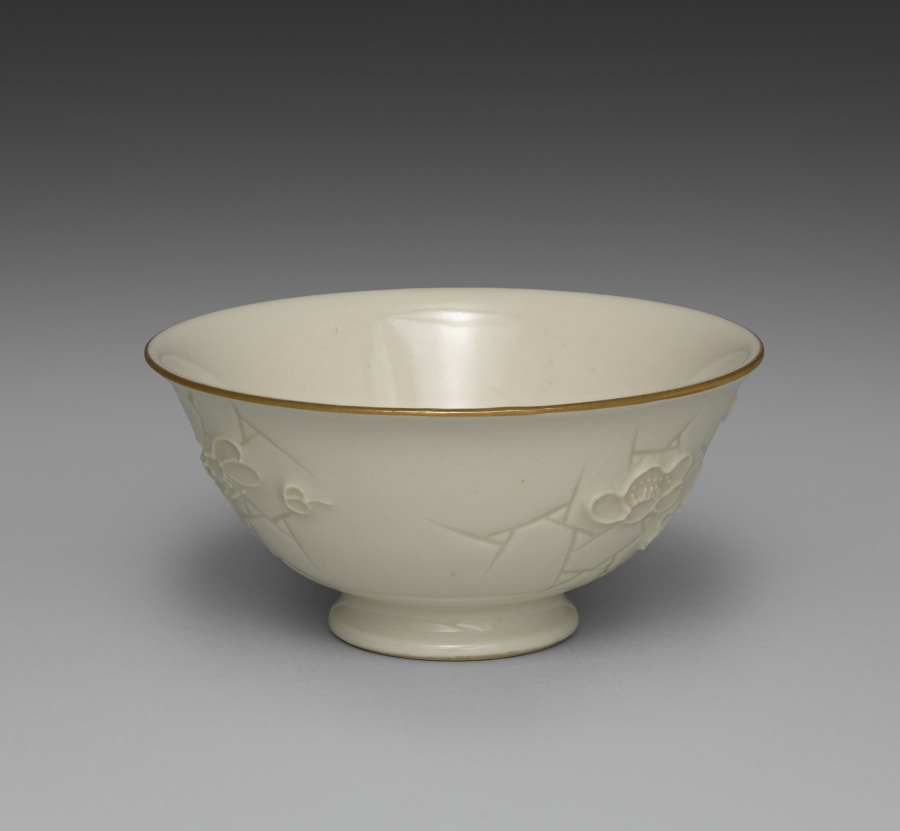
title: Bowl from Dining Set with Plum Blossoms and Cracked-Ice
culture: Japan, Meiji period (1868–1912)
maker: Seifū Yohei II (Japanese, 1844–1878)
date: c. 1875–78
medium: Porcelain with molded designs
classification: Ceramic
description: Each item in this set has a delicate low-relief design of flowering plum branches over scattered, intersecting lines meant to resemble the cracked-ice surface of a frozen body of water and is signed on the base in gold pigment. While Yohei II produced many fine works in underglaze blue, like those produced by Kiyomizu Shichibei, he also made works in quite different styles later in his career, from the early 1870 s. In 1873, he was appointed purveyor to the Industrial Center of Kyoto Prefecture, a designation associated with Kyoto’s efforts to reach an international market through the port of Kobe; and from 1875 until his death, he was involved in national-level projects to present Japanese ceramics across the world. It was during this period that Yohei III was apprenticed to Yohei II, and it has been suggested that this set may in fact be an early example of Yohei III’s work, which he signed with his teacher’s name. Decorated with flowers resembling Japanese textile motifs, the set calls to mind the design of Yohei II’s pair of vases with plum blossoms in the Victoria and Albert Museum. Here, the elaborate trees created for a formal public exhibition setting have been translated into the approachable blossoms of the genteel domestic environment. While the designs are consistent across the pieces, each raised flower petal and pistil and each incised line in the ice was done by hand, so the cups, bowls, and dishes are similar yet unique. The bottoms of two boxes once identified the set’s owner, but the information has been deliberately obscured with black ink. However, inscriptions still visible appear to indicate two occasions, once at the end of July 1886 , and once again in June 1916 , when parts of the set were requested from Hokura in Niigata Prefecture. The location corresponds to a neighborhood in the present-day city of Jōetsu. The surname Tsuji 辻 also appears on a paper tag affixed to one of the box cloths. Future research may possibly reveal more about their provenance. A vase by Yohei III in a private collection combines the formal grandeur of the Yohei II vases in the Victoria and Albert Museum with the gentler design of this dining set, placing flowering plum trees against soft, scalloped-edge clouds resembling those in golden screens.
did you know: The dining wares have a creamy white coloration that the four boxes containing them identify as Korean in style.